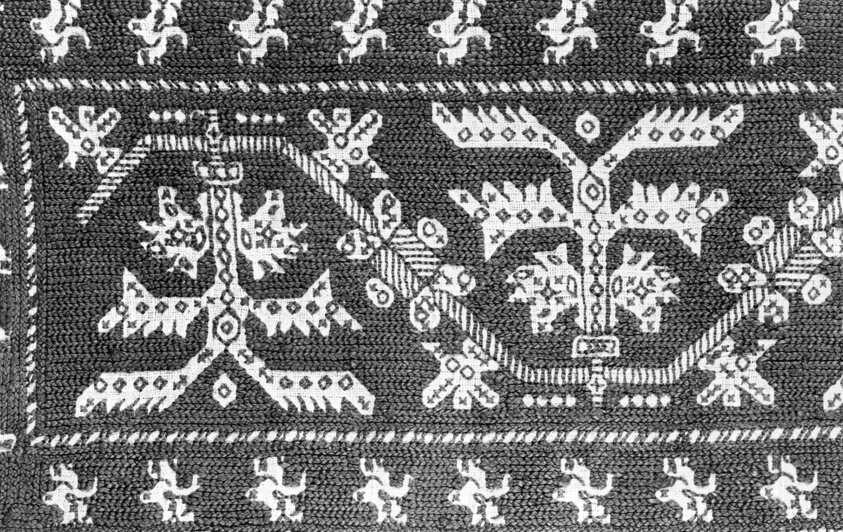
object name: Textile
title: Fragment (Border)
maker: Morocco, Azemmour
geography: Morocco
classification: textile; needlework (visual works)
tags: morocco